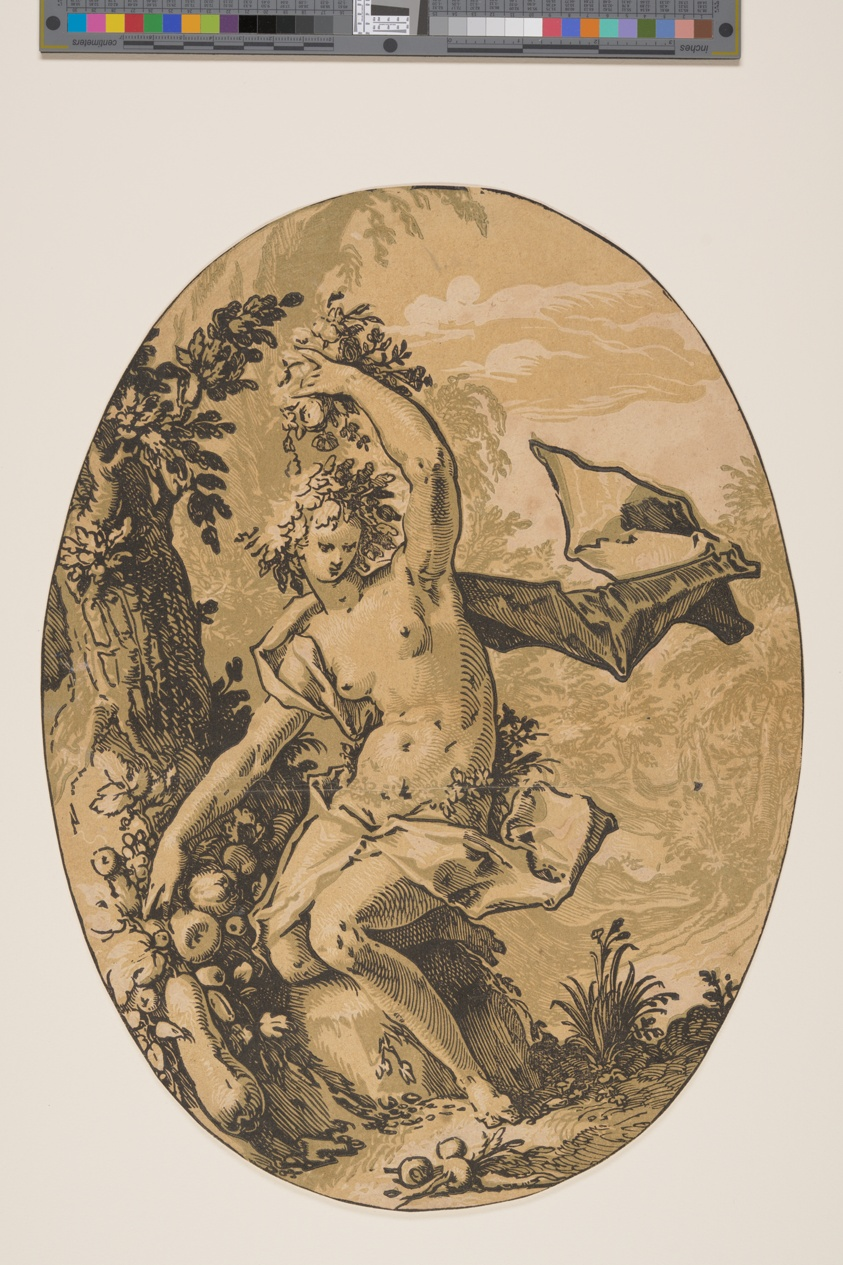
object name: Print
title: Proserpine, from The Deities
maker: Hendrick Goltzius (Dutch, 1558–1617)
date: 1588/90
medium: Chiaroscuro woodcut from three blocks in tan and green on ivory laid paper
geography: Netherlands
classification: print; paper; prints and drawing; woodcut